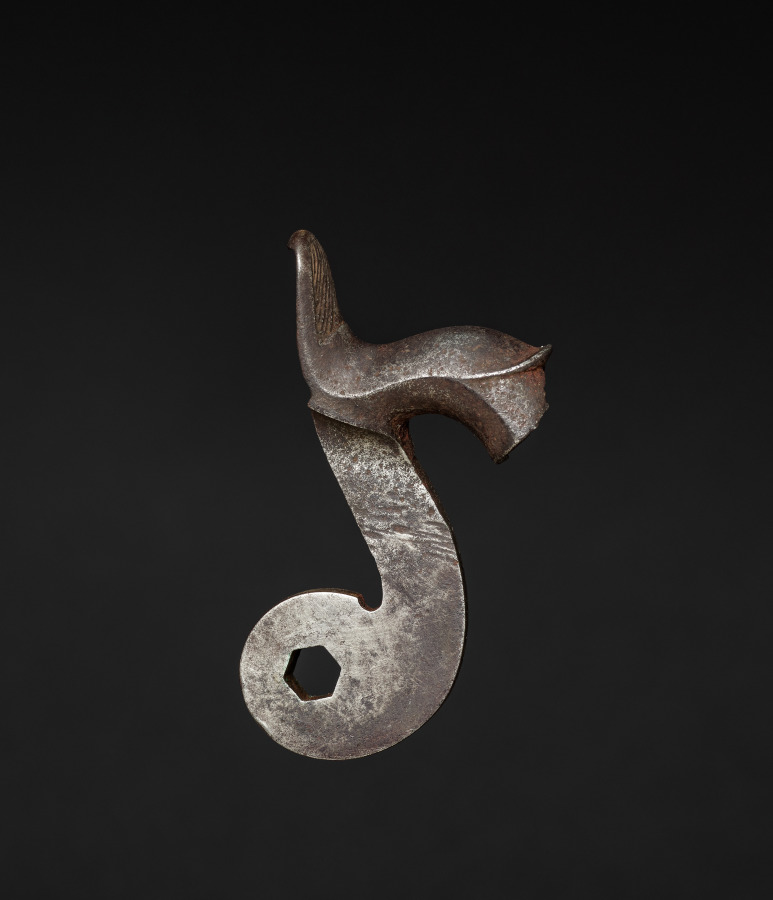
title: Gun-Lock Hammer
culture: England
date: c. 1800–1825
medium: steel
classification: Arms and Armor